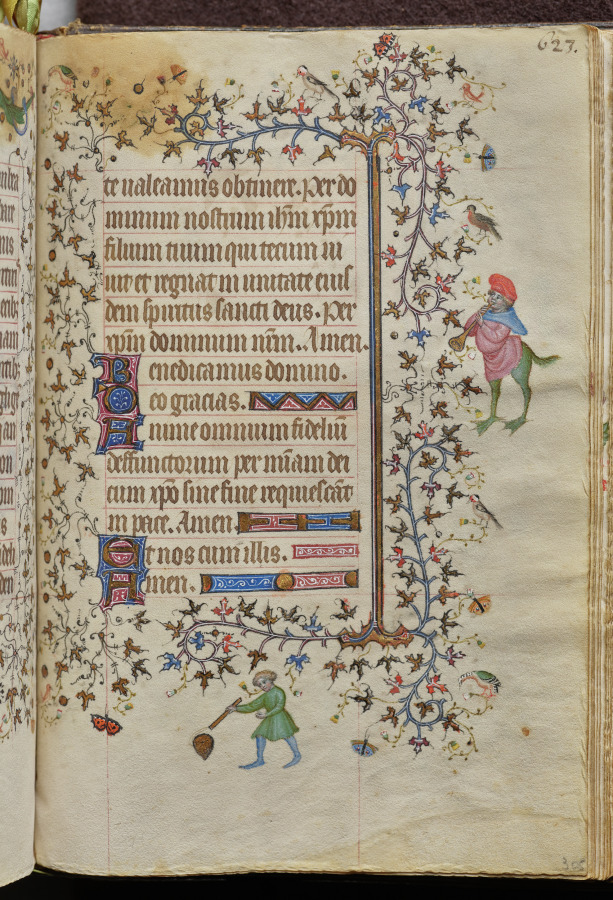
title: Hours of Charles the Noble, King of Navarre (1361-1425): fol. 306r, Text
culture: France, Paris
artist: Master of the Brussels Initials and Associates (French)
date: c. 1405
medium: ink, tempera, and gold on vellum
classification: Bound Volume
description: This precious volume was obviously highly prized by its owner, the French-born King of Navarre, who had his coat of arms painted on no less than twenty folios. Rather than directly commissioning this manuscript from a specific workshop, it seems that Charles the Noble acquired his book of hours -- perhaps ready-made for the luxury market -- while on a trip to Paris in 1404-05. A collaborative effort, six painting styles are evidenced within the pages of this codex, those of two Italians, two Frenchmen, and two Netherlanders. The painter who was responsible for the planning and decoration of the book, and who produced seventeen of the large miniatures, was a Bolognese artist known as the Master of the Brussels Initials. His principal assistant, responsible for most of the borders, was a Florentine who signed his name "Zecho" da Firenze on folio 208 verso.